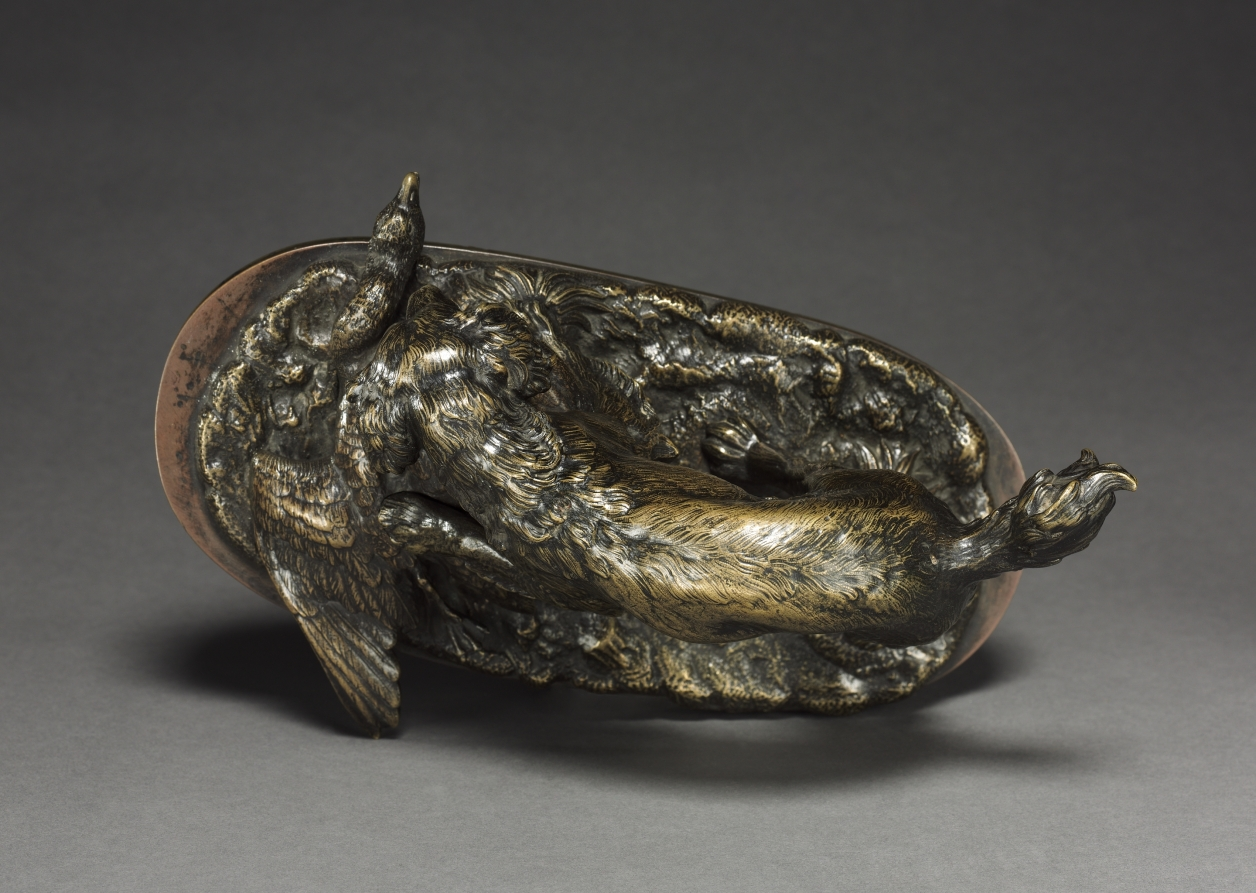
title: Spaniel and Duck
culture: France, 19th century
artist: Antoine-Louis Barye (French, 1796–1875)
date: c.1830 – 1875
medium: bronze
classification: Sculpture